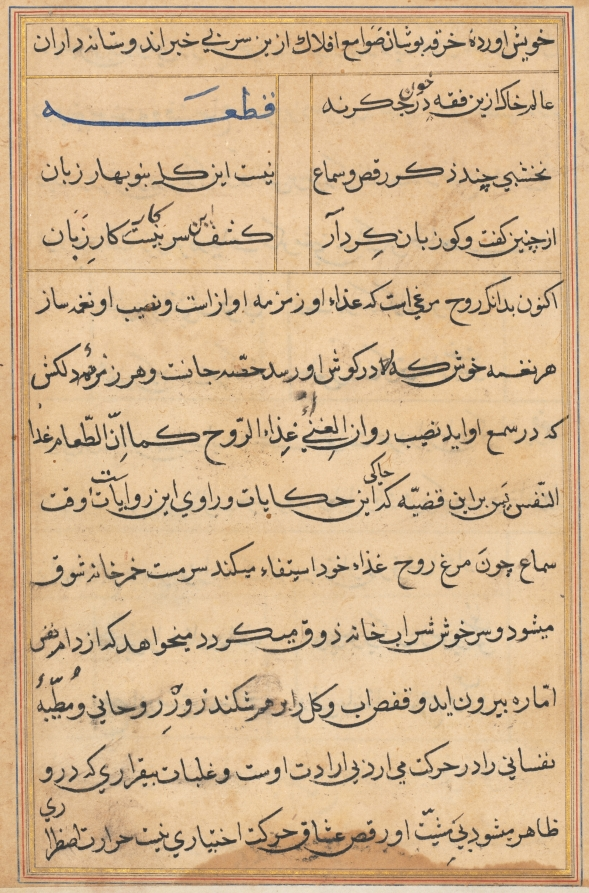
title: Page from Tales of a Parrot (Tuti-nama): text page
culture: Mughal India, court of Akbar (reigned 1556–1605)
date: c. 1560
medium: gum tempera, ink, and gold on paper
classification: Painting